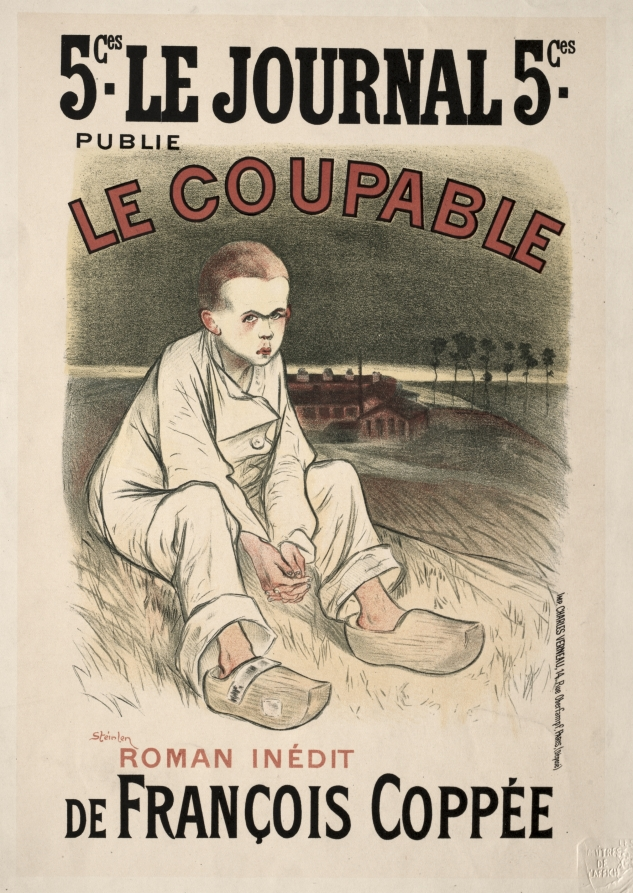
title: The Culprit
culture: Switzerland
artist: Théophile Alexandre Steinlen (Swiss, 1859–1923)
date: 1896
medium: lithograph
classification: Print